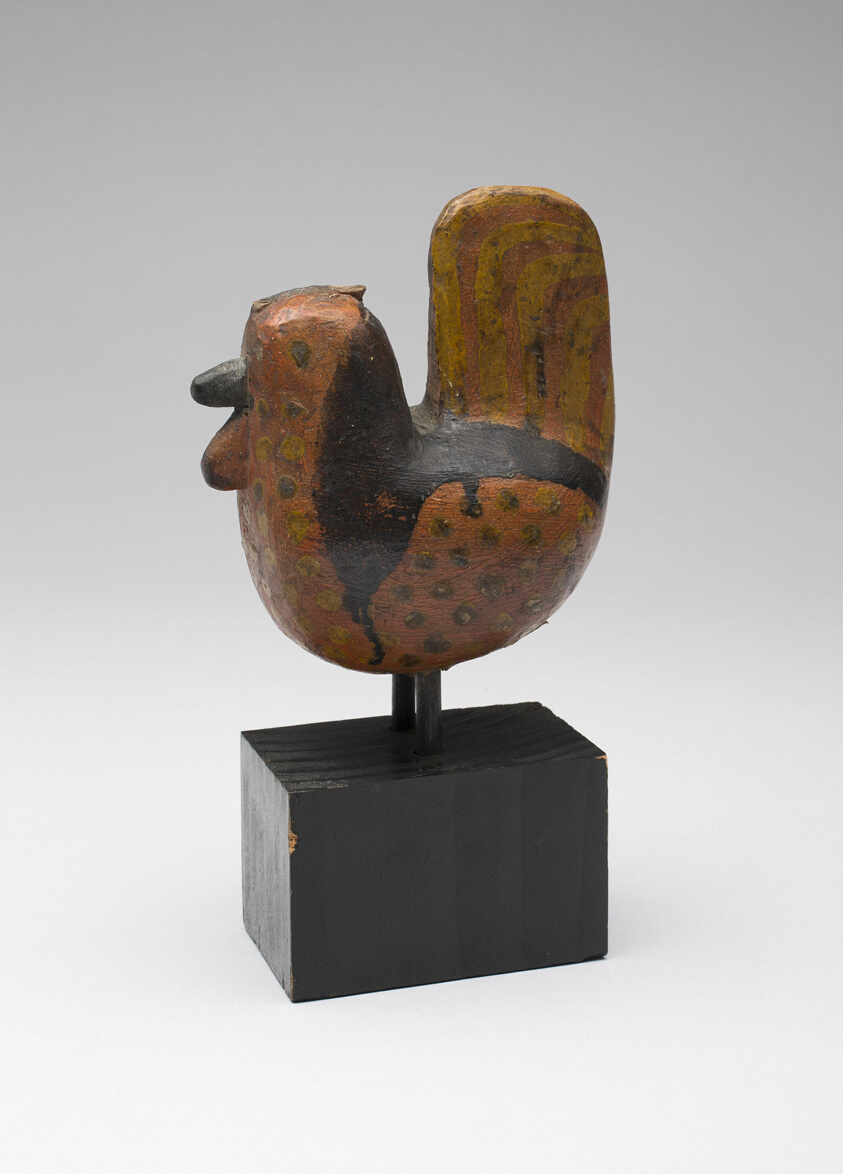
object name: Decorative Arts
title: Rooster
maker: Artist unknown (American, active 19th century); Pennsylvania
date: 1800–50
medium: Wood and paint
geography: Pennsylvania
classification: sculpture; american decorative arts; american arts; decorative arts